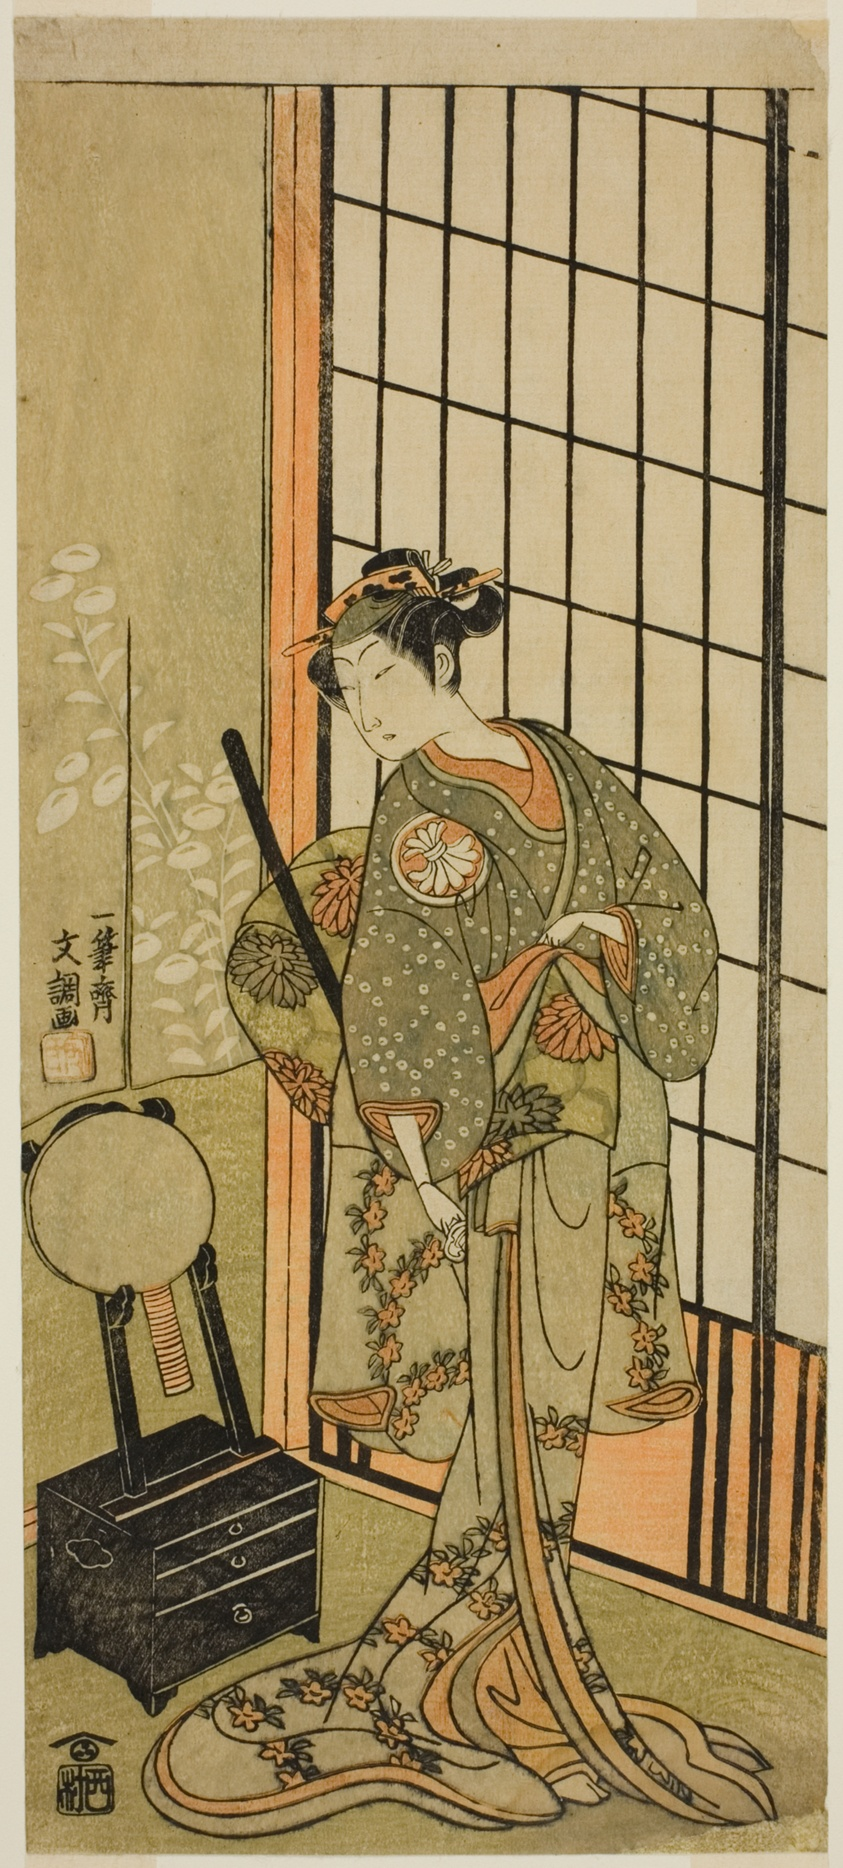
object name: Print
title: The Actor Segawa Kikunojo II as Princess Hitomaru (Hitormaru Hime) (?) in te Play Soga Moyo Aigo no Wakamatsu (?), Performed at the Nakamura Theater (?) in the First Month, 1769 (?)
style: Japanese (culture or style)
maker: Ippitsusai Buncho (Japanese, active c. 1755-90)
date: c. 1769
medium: Color woodblock print; hosoban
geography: Japan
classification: woodblock print; print; asian art